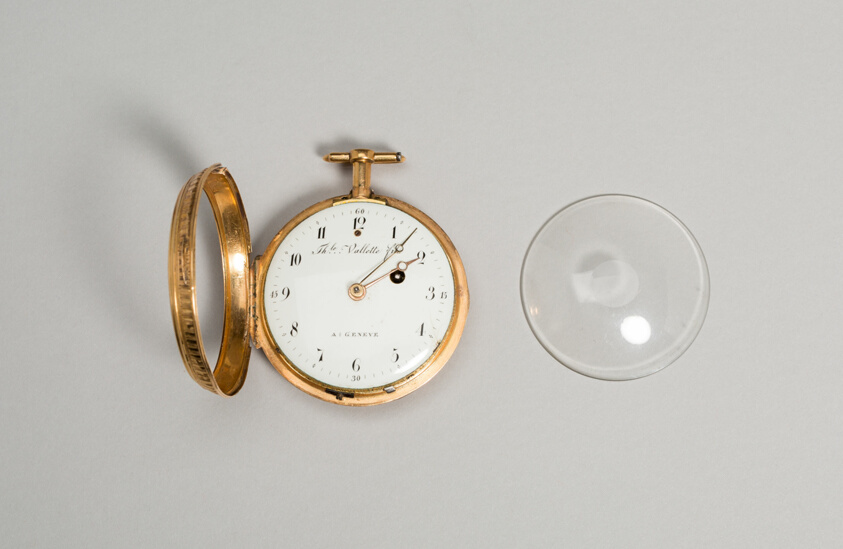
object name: Metalwork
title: Watch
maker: Geneva, Switzerland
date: Late 18th to early 19th century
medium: Gold, enamel, and crystal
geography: Switzerland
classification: gold; metal; watch; european decorative arts; metalwork